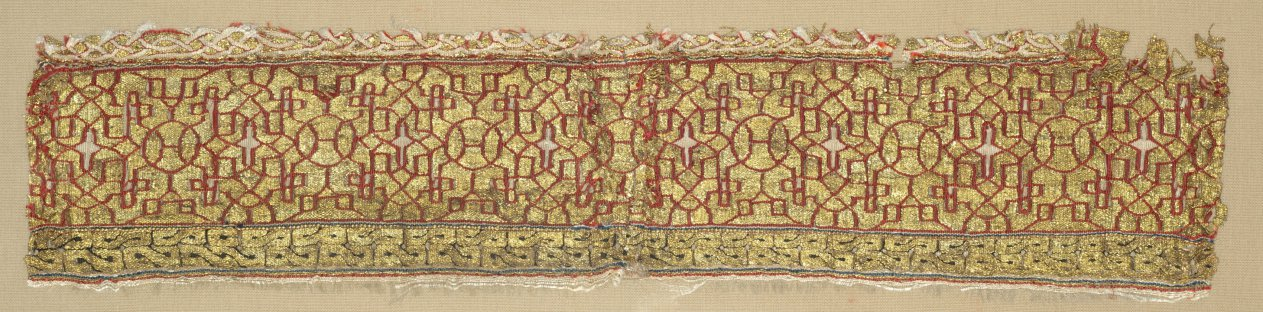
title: Guilloche band, from a dalmatic of San Valero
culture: Spain, probably Almeria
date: 1200s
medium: tapestry weave: silk and gold thread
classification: Textile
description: Rarely do medieval silks convey their original luxurious quality with such brilliant gold thread. This fragment is said to have been among relics of Saint Valerio from Lérida Cathedral (in northeast Spain, near Barcelona). An elegant geometric tracery in crimson silk decorates the gold-thread ground, bordered above by four interlacing strands in ivory silk and below by two rows of "figure 8s" woven with gold thread and black silk outlines.